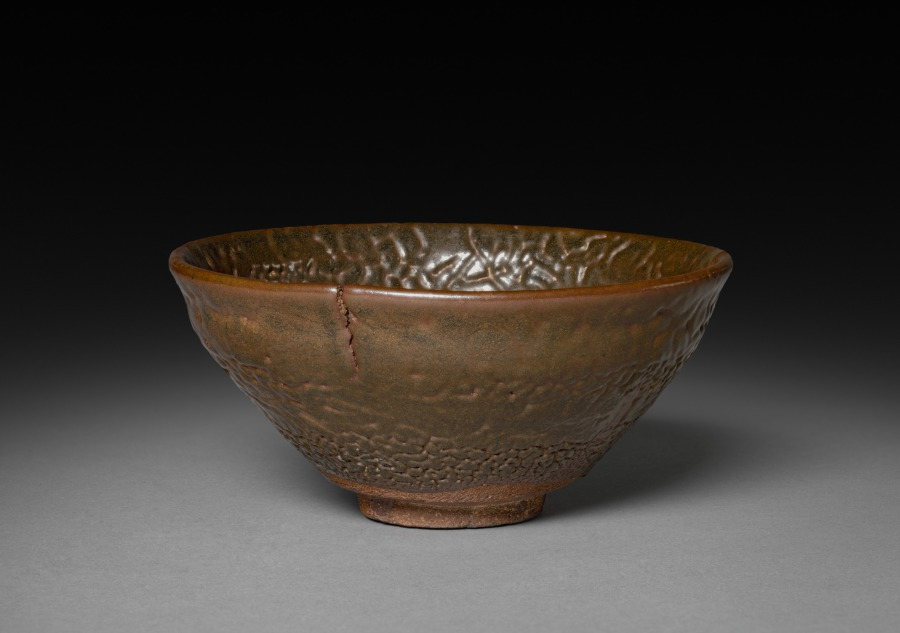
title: Tea Bowl: Jian ware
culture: China, near Shui ch'i, Song dynasty (960-1279)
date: 960–1279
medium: stoneware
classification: Ceramic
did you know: Jian ware was very popular with the tea cultures in China and Japan.